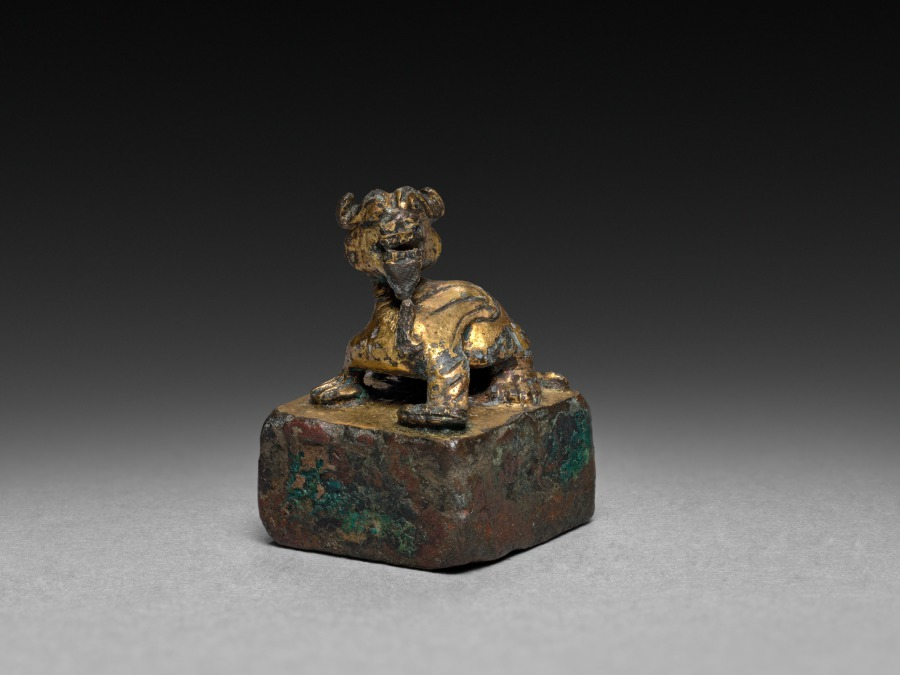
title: Chimera with Seal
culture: China, Eastern Han dynasty (25–220 CE)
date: 200s CE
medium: bronze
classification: Glyptic